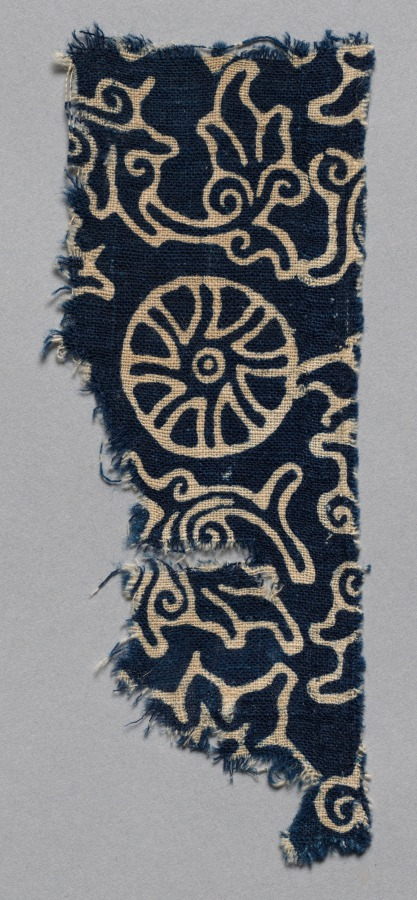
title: Fragment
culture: India, 12th-14th century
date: 1100s - 1300s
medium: plain cloth, resist dyed; cotton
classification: Textile